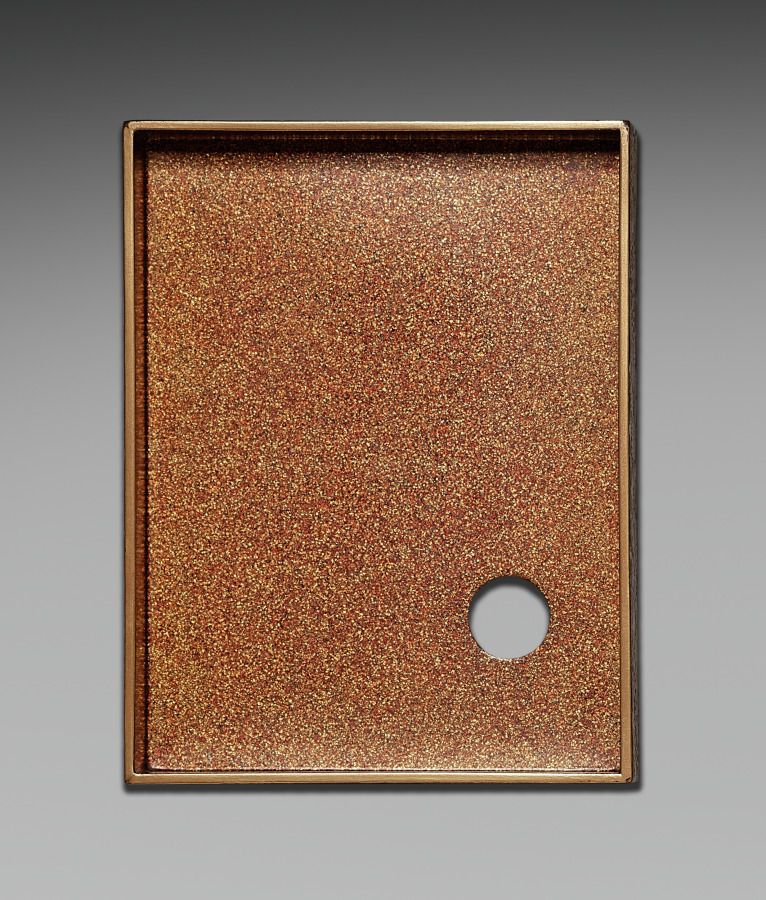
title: Nested Boxes with Chrysanthemums (outer box base)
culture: Japan, Meiji period (1868–1912)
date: early 1900s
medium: lacquer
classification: Lacquer